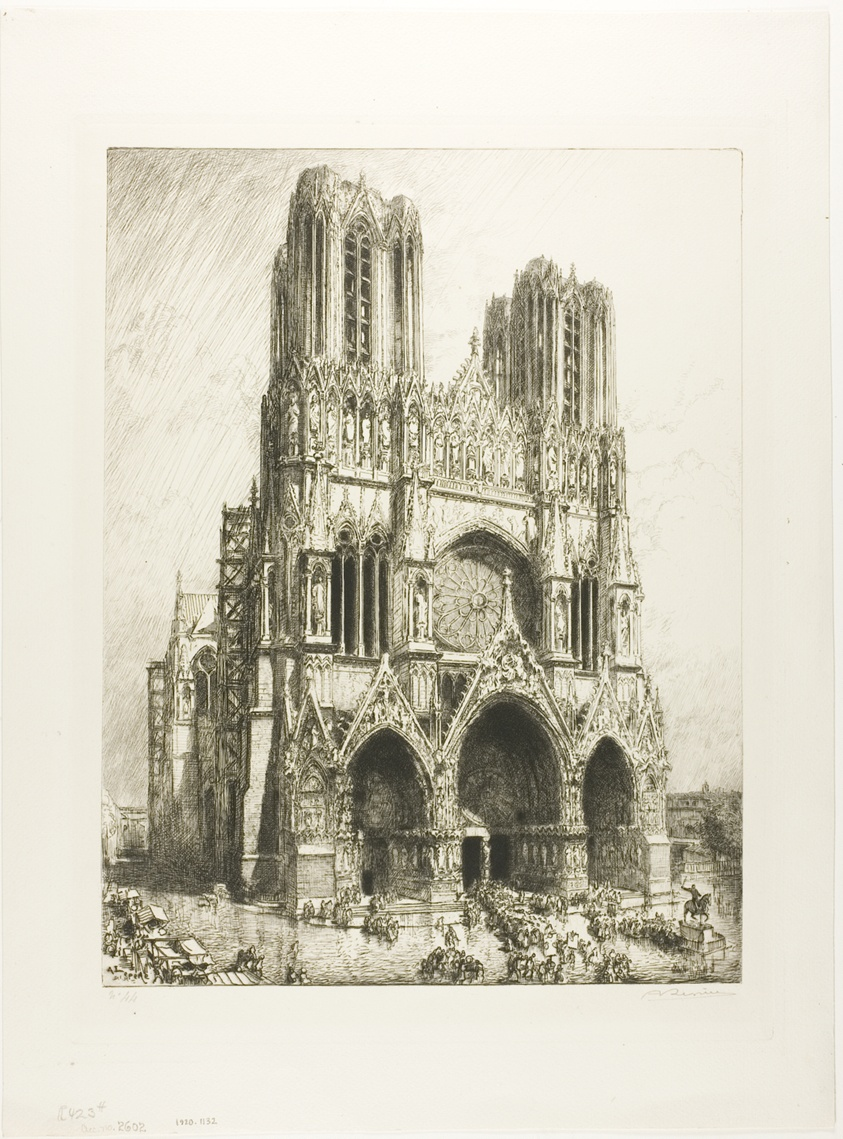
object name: Print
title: Rheims Cathedral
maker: Louis Auguste Lepère (French, 1849-1918)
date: 1911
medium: Etching on cream laid paper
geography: France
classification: etching; print; prints and drawing